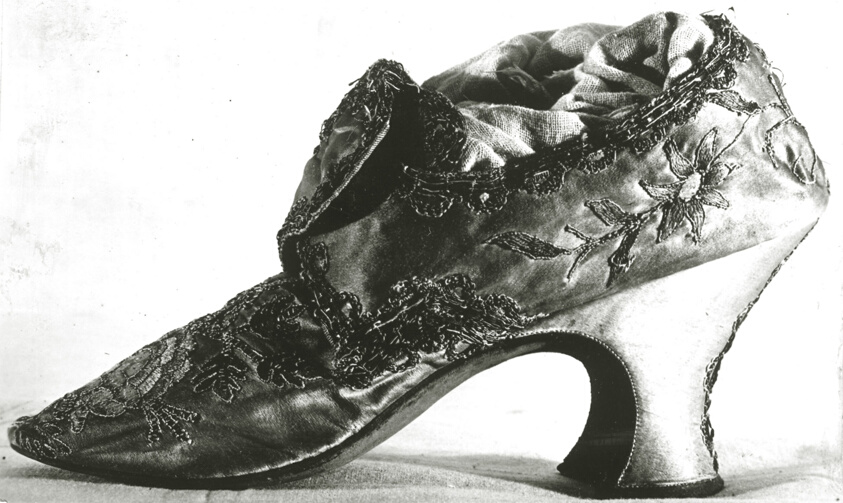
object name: Textile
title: Shoe (Single)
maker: Probably England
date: 1770s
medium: Yellow satin embroidered with silk and metal thread; satin and couched stitches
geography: England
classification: textile; shoes - needlework; costume accessory - shoe; costume; dress (garment); clothing